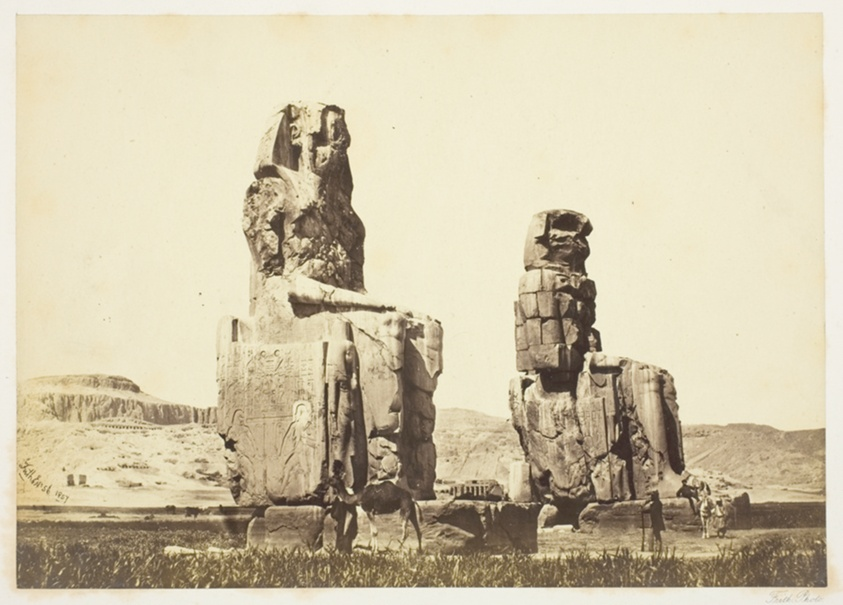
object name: Photograph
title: The Statues of Memnon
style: 19th century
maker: Francis Frith (English, 1822–1898)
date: 1857, printed 1862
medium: Albumen print, No. 56 from the album "Egypt, Palestine and Nubia" (1862)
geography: England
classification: albumen silver print; photographic process; photography; photograph